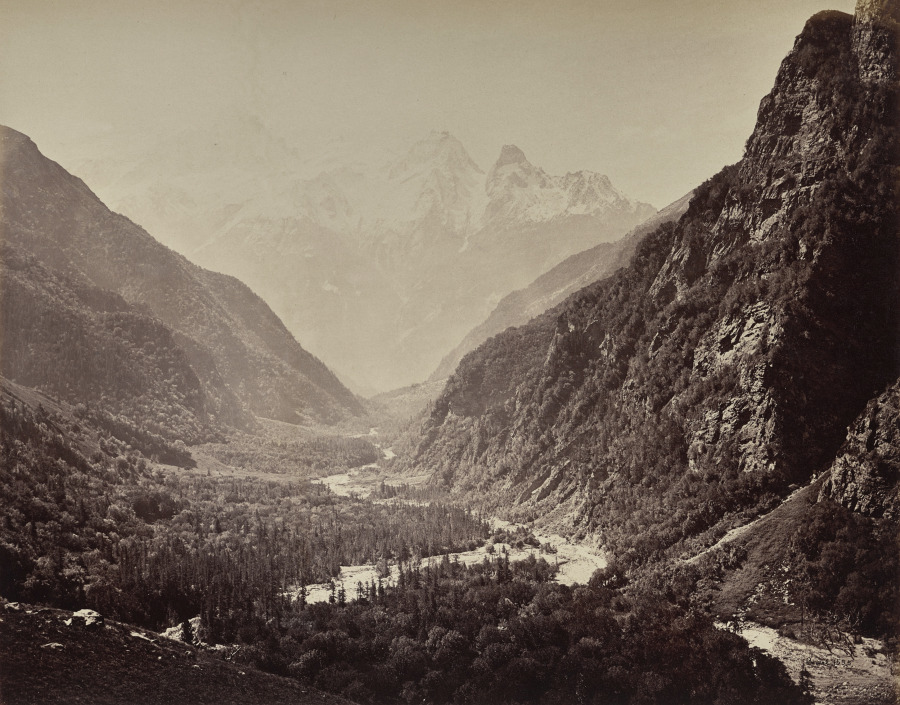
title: The Upper Himmalayahs. View of Valley from Fallaldasa with Srikanta Peaks in the Distance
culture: England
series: Photographs of Northern India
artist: Samuel Bourne (British, 1834–1912)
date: 1863–70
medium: albumen print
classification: Photograph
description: The 50 images in this album, all taken in the 1860s, move from the hill towns of the Himalayas down to cities including Lahore (now in Pakistan), Delhi, Lucknow, Agra, Benares (now Varansi), and Calcutta (now Kolkata). Architectural studies of major monuments offer valuable historical records of what sites such as the Taj Mahal and the imperial mosque of the Mughal emperors in Delhi looked like before twentieth-century restorations.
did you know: Samuel Bourne, the author of most the images in this album, was a banker in England before he moved to India to become a professional photographer.